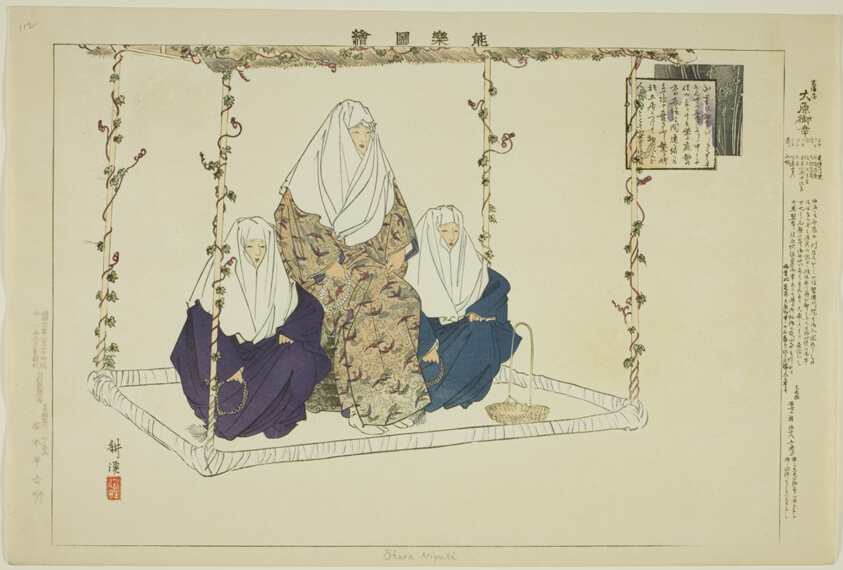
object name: Print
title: Ohara Miyuki, from the series "Pictures of No Performances (Nogaku Zue)"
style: Japanese (culture or style)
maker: Tsukioka Kogyo; Japanese, 1869-1927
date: 1898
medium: Color woodblock print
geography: Japan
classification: woodblock print; print; asian art